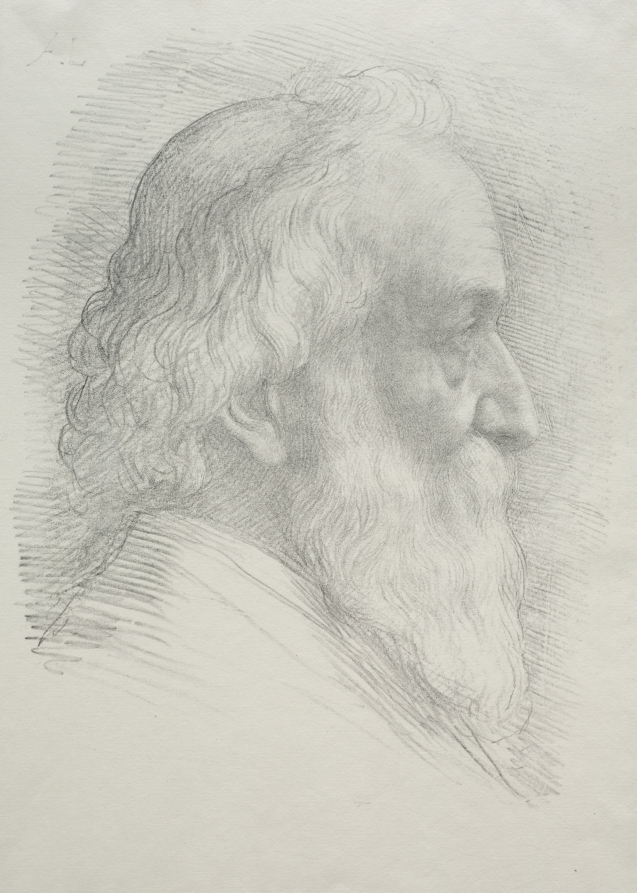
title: Self-Portrait (10th Plate)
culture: France, 19th century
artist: Alphonse Legros (French, 1837–1911)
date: c. 1857–1911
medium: lithograph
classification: Print